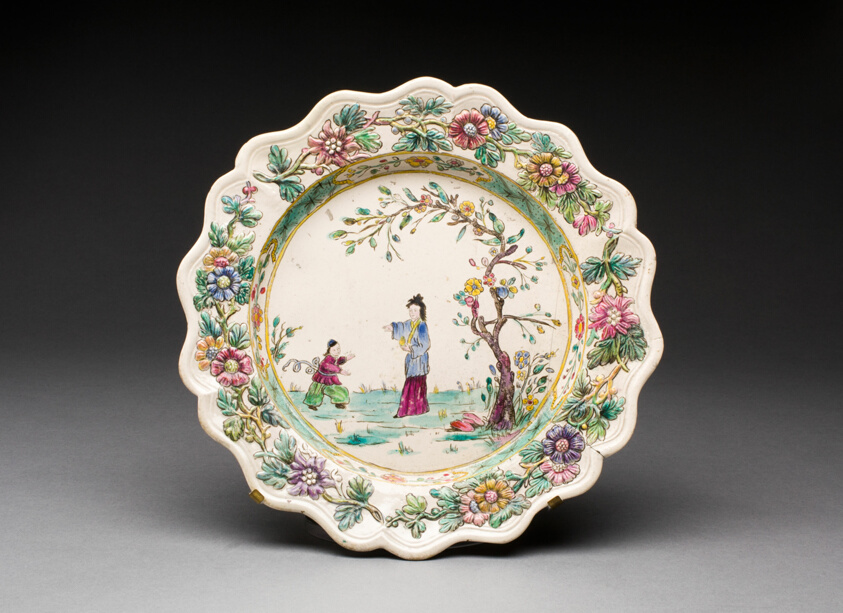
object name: Ceramics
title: Plate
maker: England, Staffordshire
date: 1760/69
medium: Salt-glazed stoneware, polychrome enamels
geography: Staffordshire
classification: plate (general, dish); dish (vessel); stoneware; european decorative arts; salt-glazed stoneware; ceramics